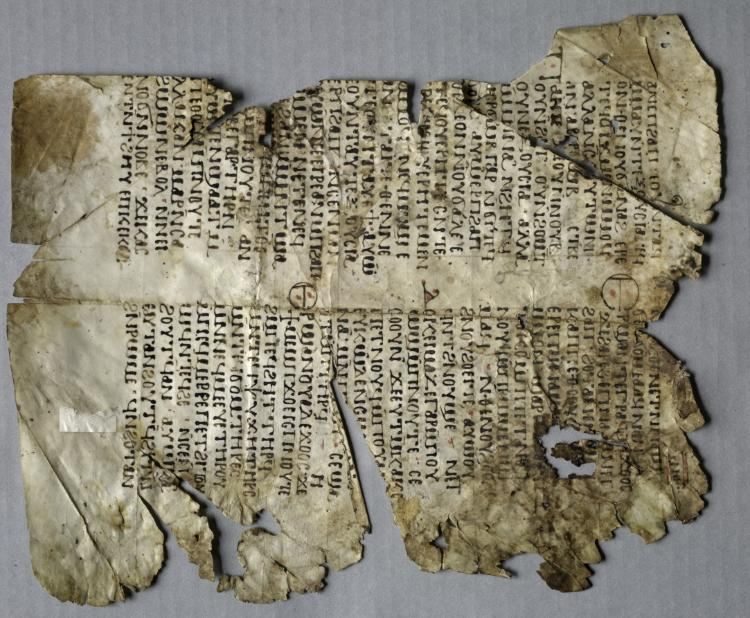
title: Leaf from a Christian Homily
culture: Egypt, Coptic period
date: 500s-600s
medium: ink on vellum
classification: Manuscript